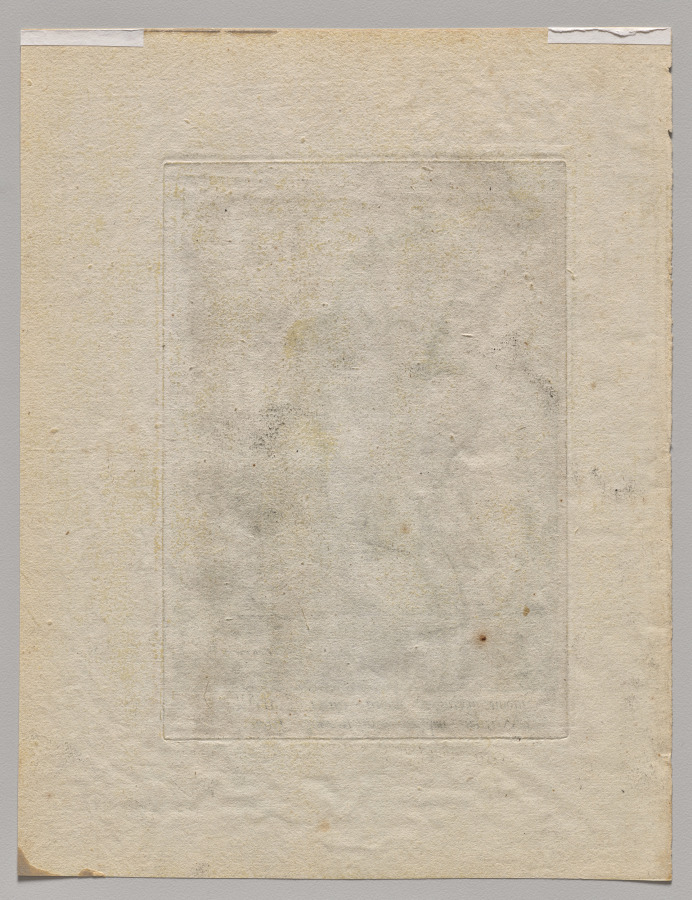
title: Plate 5: Zabulun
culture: Netherlands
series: The Twelve Sons of Jacob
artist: Jacob de Gheyn II (Netherlandish, 1565–1629)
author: after Karel I van Mander (Netherlandish, 1548–1606)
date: c. 1589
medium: engraving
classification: Print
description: n this print, the biblical figure Zabulun is shown holding an anchor and fishing line before a harbor, denoting his tribe’s domicile near the sea. This is one of a series of prints depicting the twelve sons of Jacob, each with an attribute and costume that denotes his character. According to the Old Testament, Jacob blessed each of his twelve sons, prophesizing the destiny of their tribe, and assigning them a parcel of land in Canaan. The print series was made in the Netherlands in the late 16th century, a time of political struggle when Old Testament heroes were popular exemplars of fortitude and patience.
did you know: References to seafaring including a fishing line, anchor, and navigational device, suggest that this Old Testament figure prospers from the merchant trades.